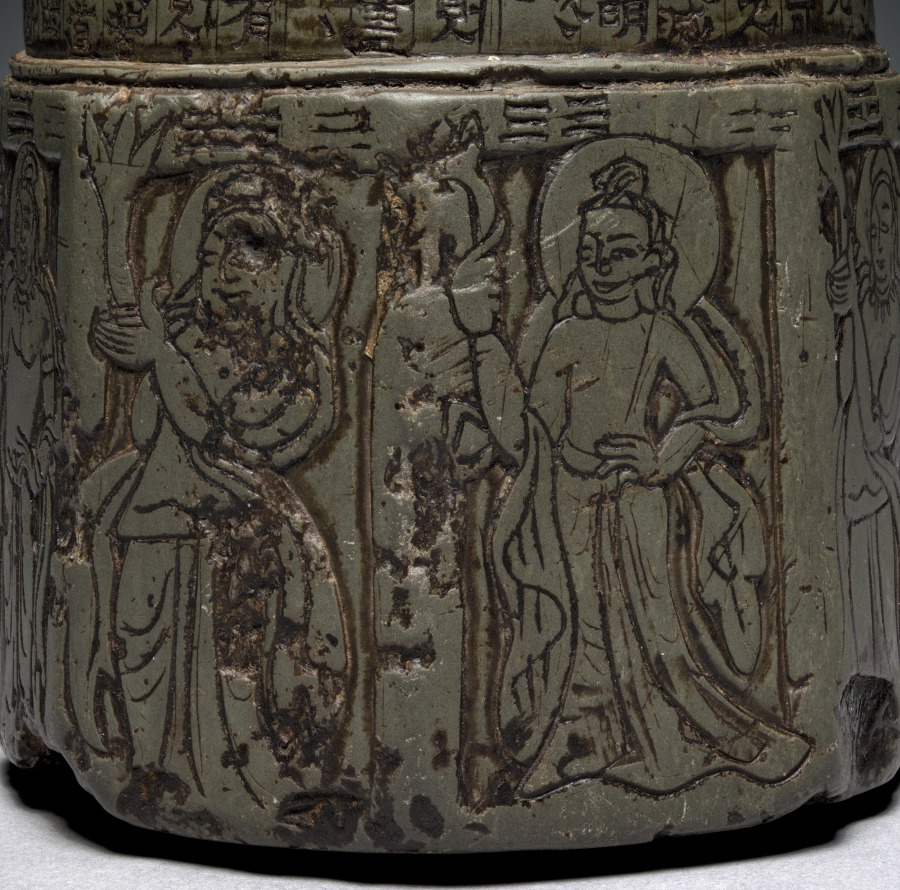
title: Miniature Votive Stupa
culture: China, Gansu province, Northern Wei dynasty (386-534)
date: 435 CE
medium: steatite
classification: Sculpture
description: This sutra pillar, inscribed with a sacred Buddhist text, belongs to a group of miniature stupas (jingta) that were found exclusively in the Gansu corridor, Northwest China. Ranging in date between AD 426–36, some of them bear the names of the lay Buddhist donors who commissioned them. A stupa is an architectural round structure built for the veneration of Buddhist relics. Miniature stupas may have commemorated the visit of a sacred site or represented donations to religious communities and sites.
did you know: There are trigrams, three horizontal lines, broken or continuous, above each of the eight bodhisattvas in the stupa's lower section.